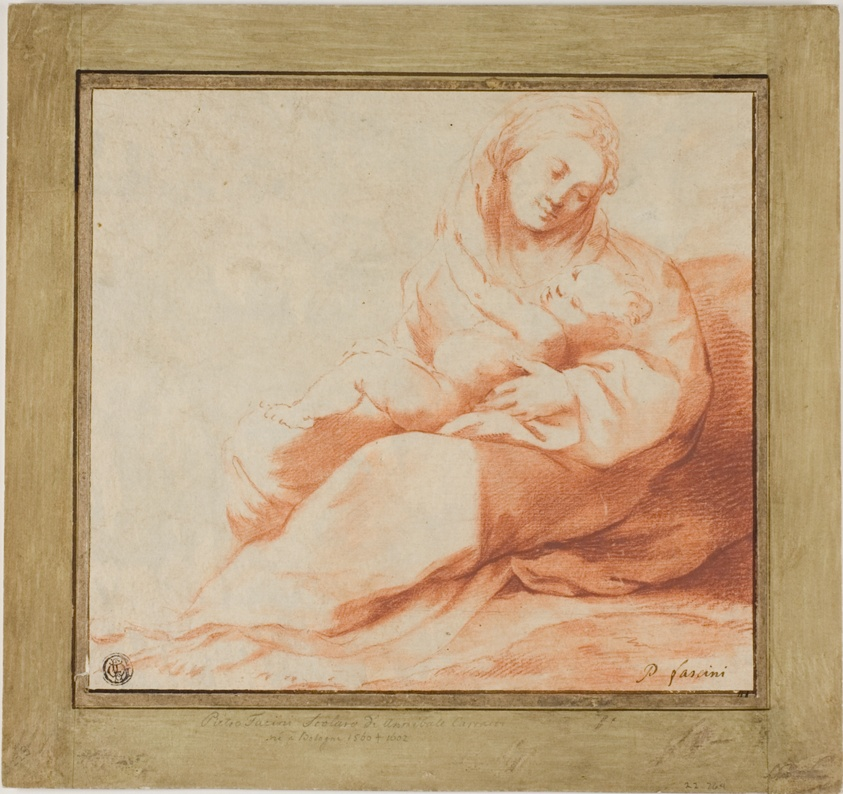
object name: Drawing and Watercolor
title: Madonna and Child Seated on Ground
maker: Attributed to Giulio Cesare Amidano; Italian, 1572-1629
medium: Red chalk on ivory laid paper, laid down on ivory laid paper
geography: Italy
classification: chalk; drawings (visual works); prints and drawing